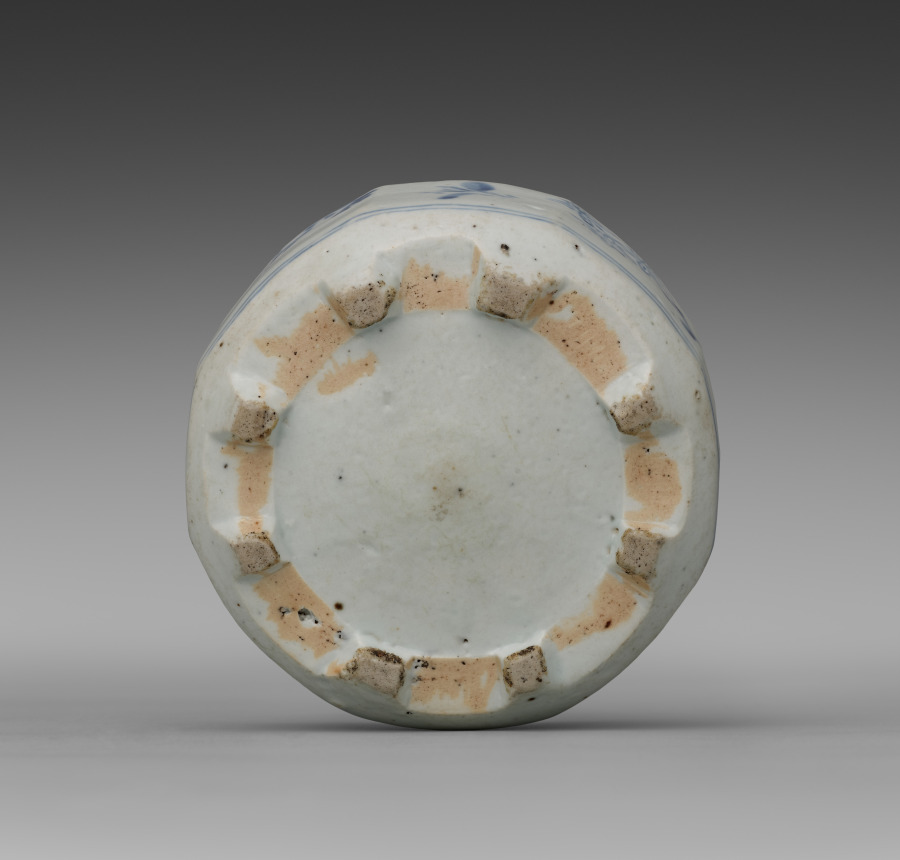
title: Octagonal Water Dropper Decorated with Flower Design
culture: Korea, Joseon dynasty (1392–1910)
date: late 1700s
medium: Porcelain with blue and white decoration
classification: Ceramic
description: A water dropper was an essential utensil for a literati man of the Joseon dynasty (1392–1910) in writing calligraphy. It was used to add water, by small drops, to an inkstone while grinding an ink stick. This work has a small spout in the shape of a cicada. This decorative element not only adds a sense of whimsical sensibility to this scholarly utensil, but also aims to symbolize the aspiration for scholarly achievement—as loud as the cicada’s song.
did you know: A small spout in the shape of a cicada is placed on one of the octagonal sides. This decorative element not only adds a sense of whimsical aesthetic sensibility to this scholarly utensil, but also aims to symbolize the aspiration for scholarly achievement—as loud as the cicada’s song.